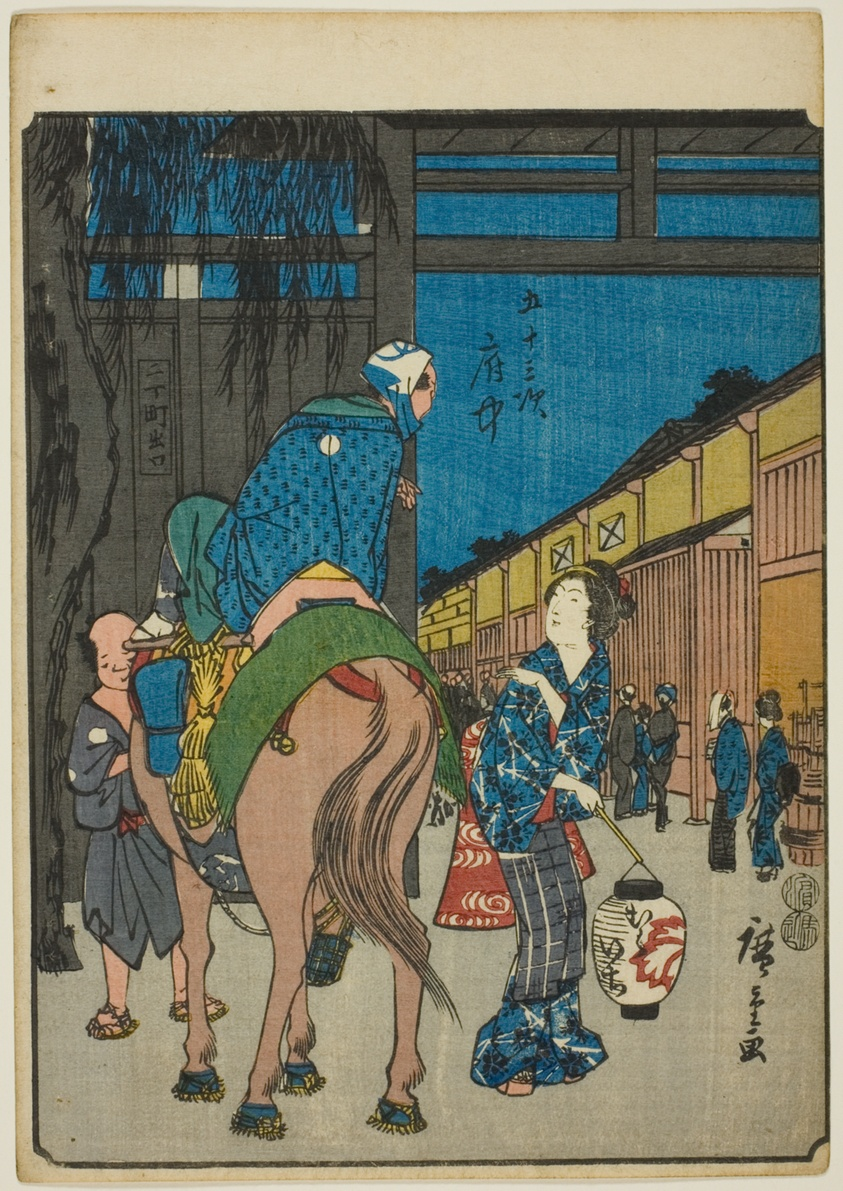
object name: Print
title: Fuchu, from the series "Fifty-three Stations [of the Tokaido] (Gojusan tsugi)," also known as the Figure Tokaido (Jinbutsu Tokaido)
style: Japanese (culture or style)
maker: Utagawa Hiroshige 歌川 広重; Japanese, 1797-1858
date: 1852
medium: Color woodblock print; chuban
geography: Japan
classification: woodblock print; print